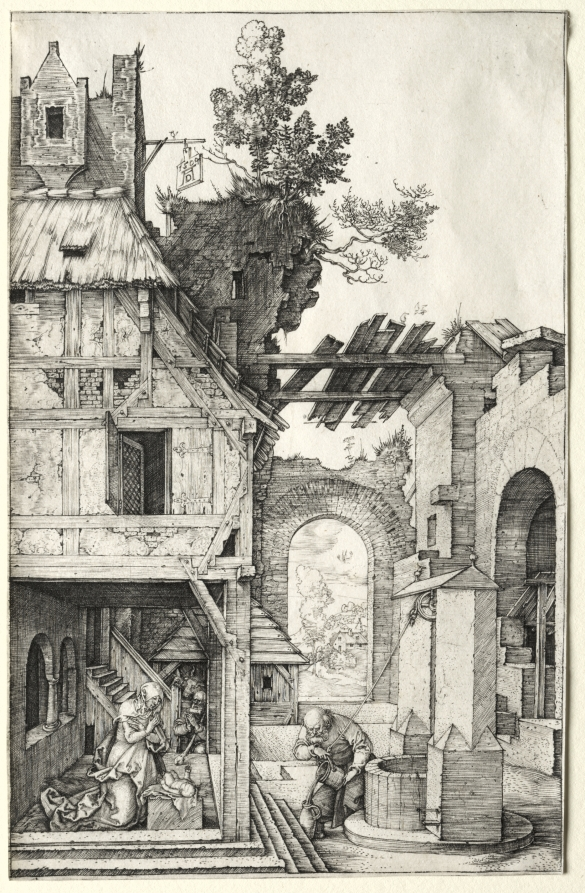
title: The Nativity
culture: Germany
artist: Albrecht Dürer (German, 1471–1528)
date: 1504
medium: engraving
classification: Print